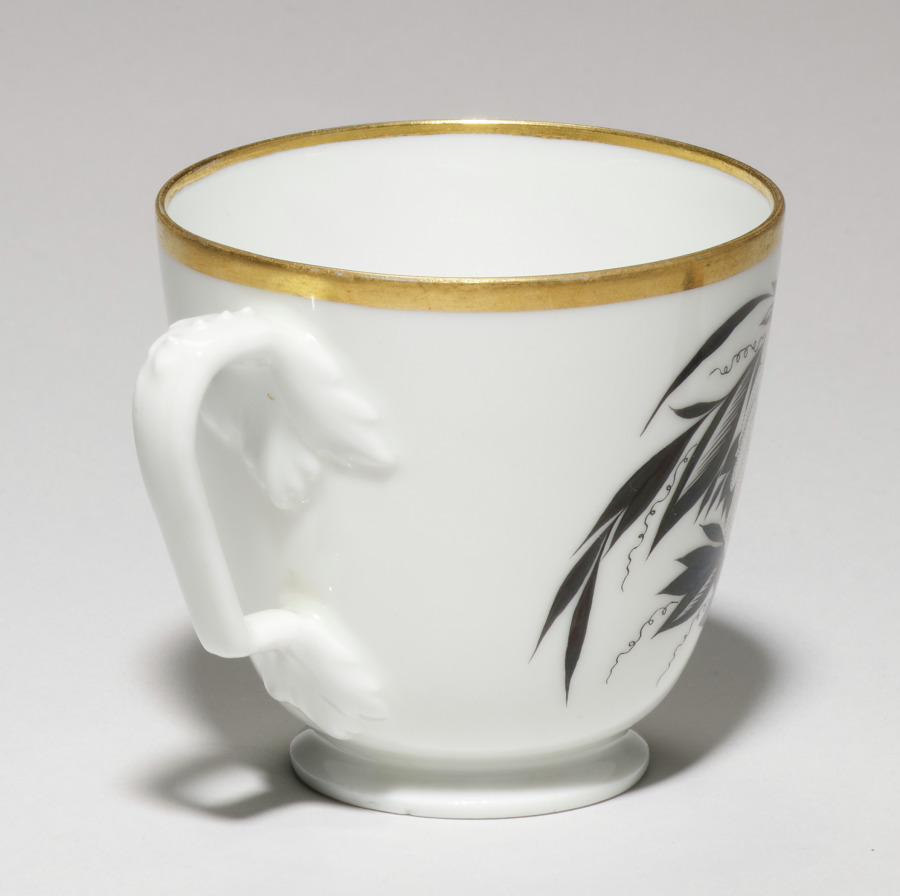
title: Cup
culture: Russia, St. Petersburg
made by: St. Petersburg Imperial Porcelain Factory (Russian)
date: 1881–1917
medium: porcelain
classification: Ceramic